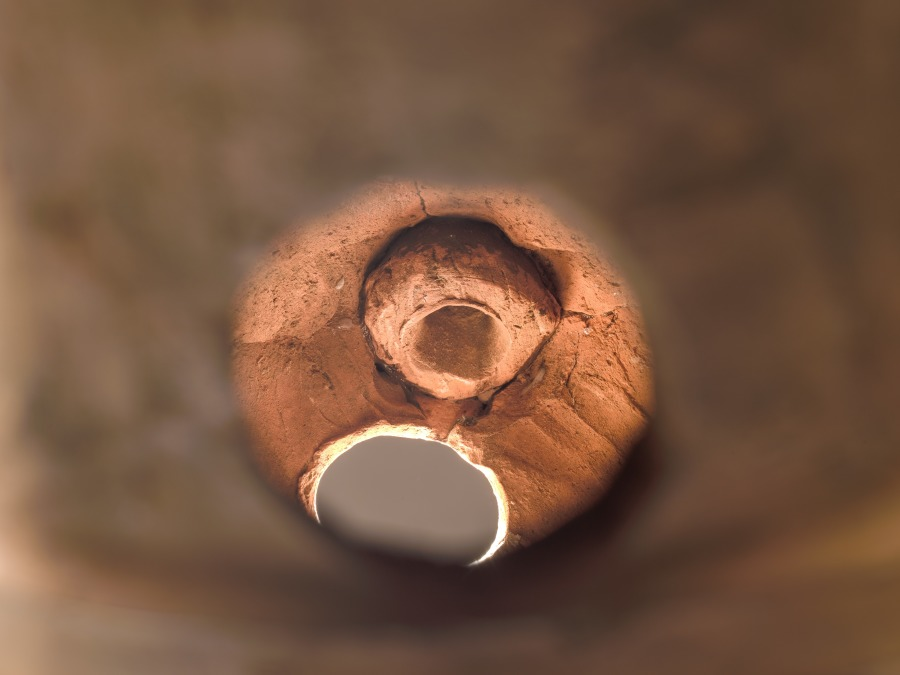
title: Haniwa Horse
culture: Japan, Kofun period (300–710 CE)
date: 400s–500s CE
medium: earthenware with traces of pigment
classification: Sculpture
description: This horse’s tack, with its round bells, resembles saddlery in fashion in Korea during the 400s–500s CE. Concurrent with mass migration from the Korean Peninsula, tombs covered with large earthen mounds similar to those on the Asian continent began to appear in Japan around the year 300 CE. Called “old mounds” (kofun), their surfaces were covered with hollow clay cylinders (haniwa). Sculptures of animals, buildings, and finally human figures followed, developing over the ensuing three centuries.